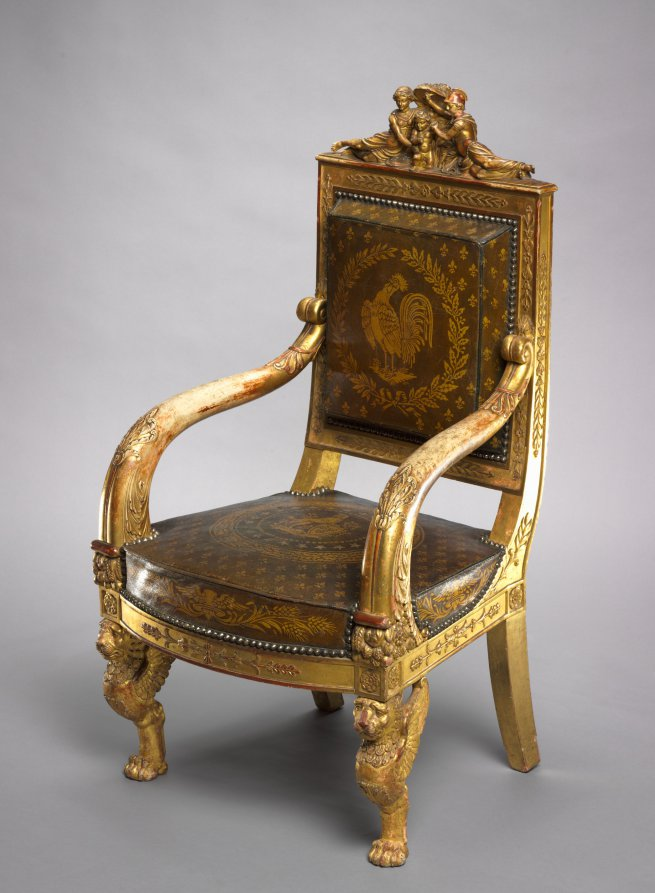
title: Child's Throne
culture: France, Paris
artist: Pierre-Marie Balny le Jeune (French, 1832)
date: 1822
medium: carved and gilded wood, leather upholstery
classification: Furniture and woodwork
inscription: inscribed with stencils inside back rail: BLONDEL TAPISSIER/RUE ST. ANTOINE N 72 1822 inscribed in ink lower edge back rail: 12 JANVIER 18[22?]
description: This chair was made for the young, presumed successor to the French throne who ruled briefly as Henri V in 1830, the last of the direct Bourbon line. He is depicted at the center of the top rail protected by female figures representing France and Minerva, the Roman goddess of wisdom. Fleurs-de-lis and the Gallic rooster, symbols of French royalty and the French people, decorate the upholstery.